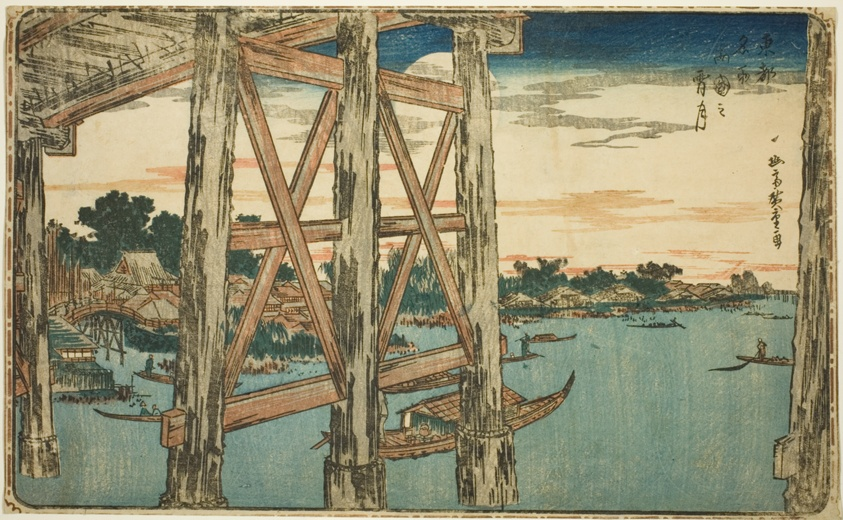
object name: Print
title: Twilight Moon at the Ryogoku Bridge (Ryogoku no yoizuki), from the series "Famous Views of the Eastern Capital (Toto Meisho)"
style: Japanese (culture or style)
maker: Utagawa Hiroshige 歌川 広重; Japanese, 1797-1858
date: c. 1831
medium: Color woodblock print; oban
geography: Japan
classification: woodblock print; print; asian art